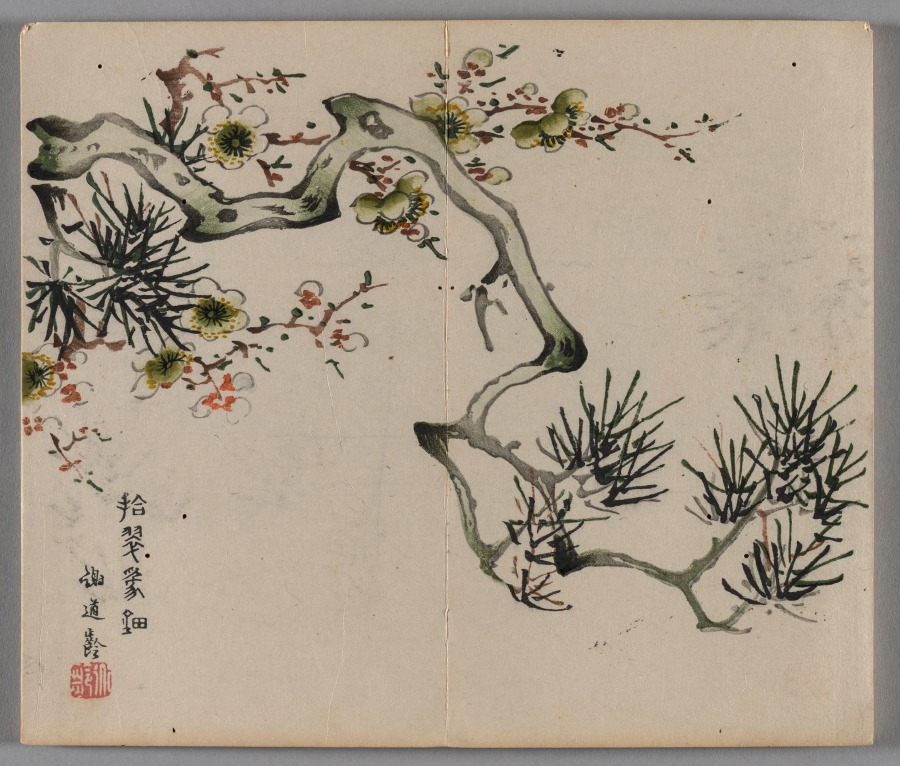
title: Ten Bamboo Studio Painting and Calligraphy Handbook (Shizhuzhai shuhua pu): Plum Blossoms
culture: China, Qing dynasty (1644-1911)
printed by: Hu Zhengyan (Chinese, c. 1584–1674)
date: 1633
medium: Woodblock-printed book; ink and colors on paper; first edition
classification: Print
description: Color printing reached a level of perfection in the early 1600s, as seen in this Ten Bamboo Studio Collection of Calligraphy and Painting and the Mustard Seed Garden Manual of Painting (printed 1679 and 1701). The painterly quality, precision in registering (aligning) the woodblocks, and harmonious colors made them the most successful color print editions in Chinese history. Both editions were printed and compiled in Nanjing, spread nationwide, and had a great impact on the arts in Japan and Korea.